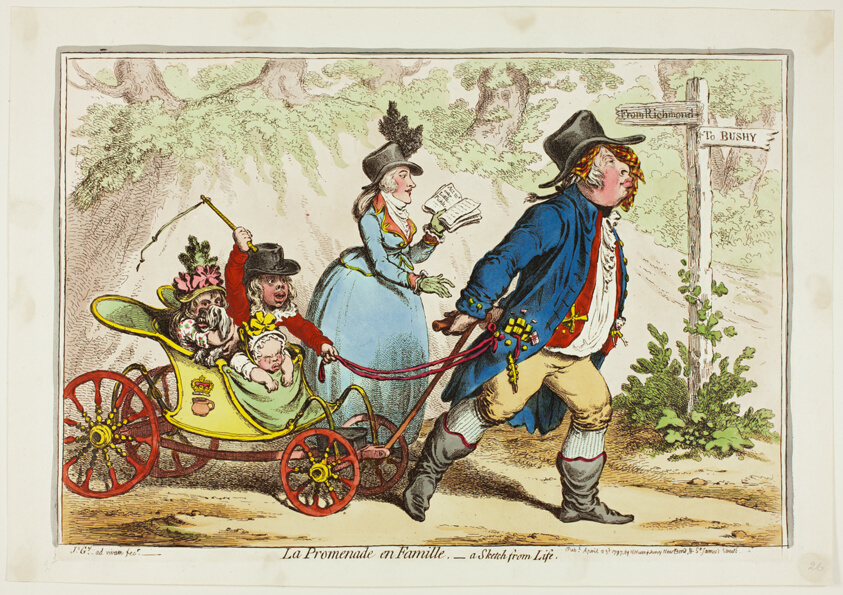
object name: Print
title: La Promenade en Famille- A Sketch from Life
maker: James Gillray (English, 1756-1815); published by Hannah Humphrey (English, c. 1745-1818)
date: published April 23, 1797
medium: Hand-colored etching on paper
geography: England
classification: etching; print; prints and drawing